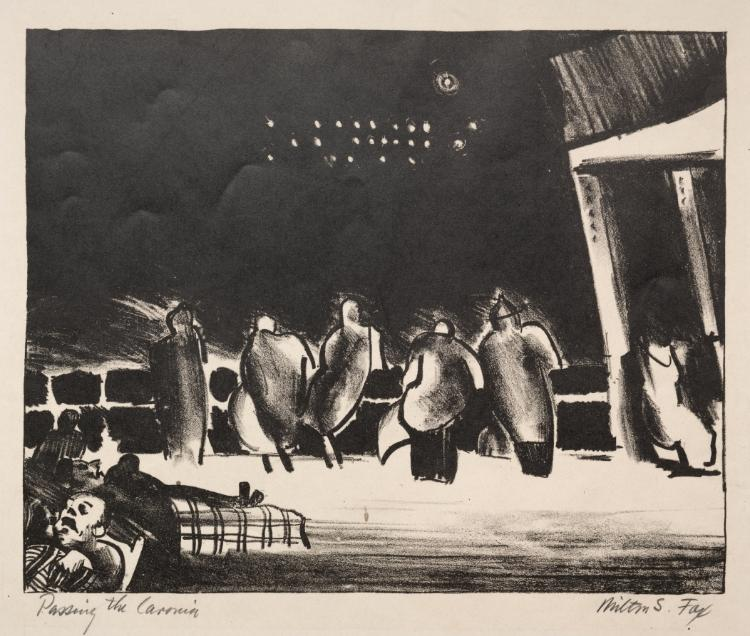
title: Passing the Coronia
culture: America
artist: Milton S. Fox (American, 1904–1971)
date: 1928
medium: lithograph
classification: Print